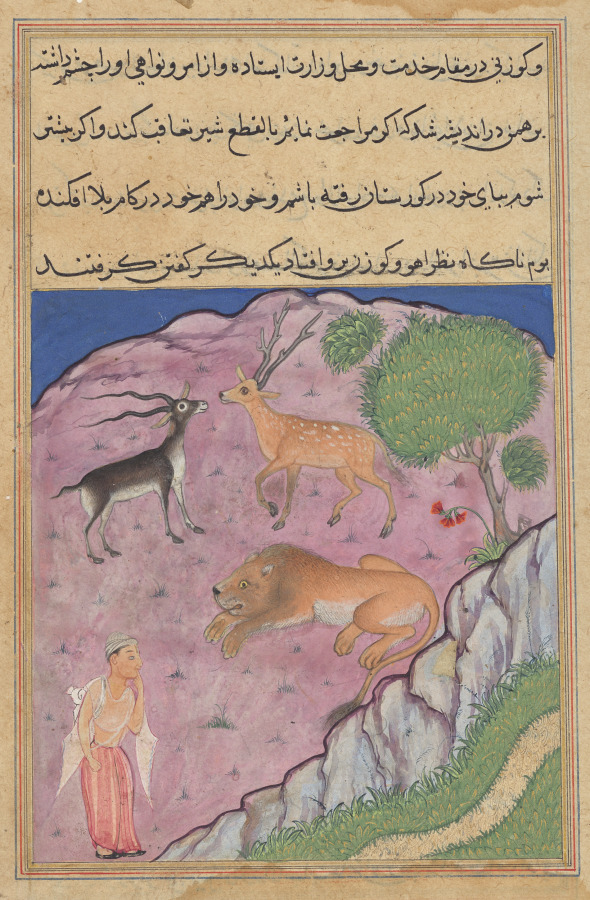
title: The Brahman comes upon a lion who has a deer and a gazelle as his viziers, from a Tuti-nama (Tales of a Parrot): Twenty-first Night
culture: Mughal India, court of Akbar (reigned 1556–1605)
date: c. 1560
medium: gum tempera, ink, and gold on paper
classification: Painting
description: On the left, the wary Brahman approaches the great lion, who rests on the banks of a river. Before the lion can attack, the deer and the gazelle step in and council him to receive the Brahman kindly. The Brahman has wandered into the wilderness after losing all of his wealth, but the lion gifts him an immense treasure.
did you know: The Brahman has a mark on his forehead identifying him as a worshipper of the Hindu god Vishnu.